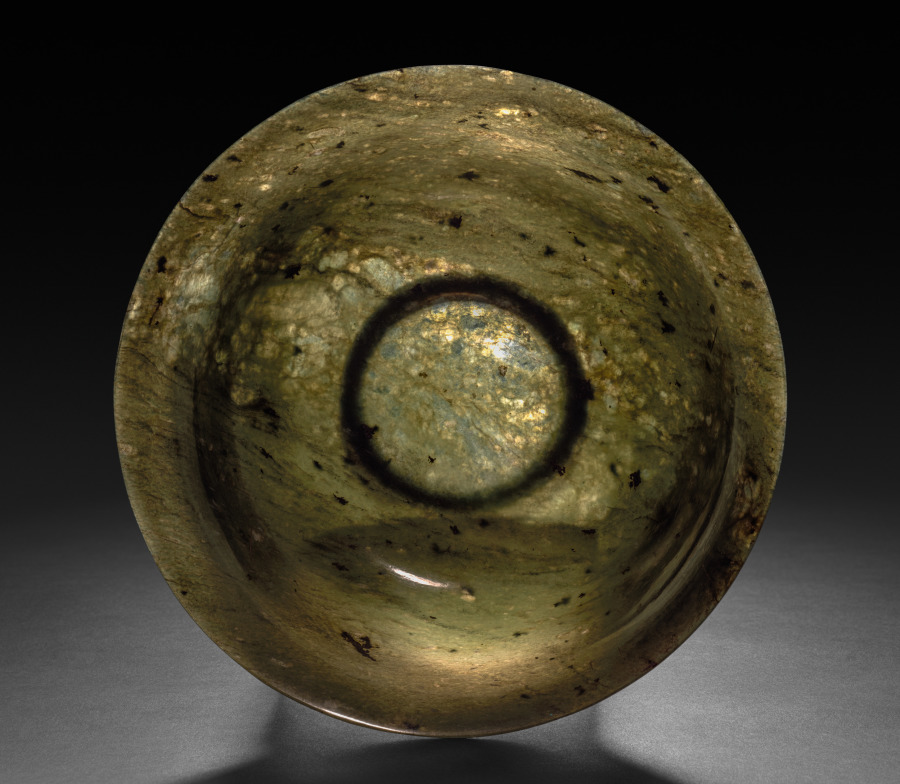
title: Bowl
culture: China, Qing dynasty (1644–1911), Qianlong reign (1736–95)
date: 1736–95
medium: spinach jade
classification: Jade